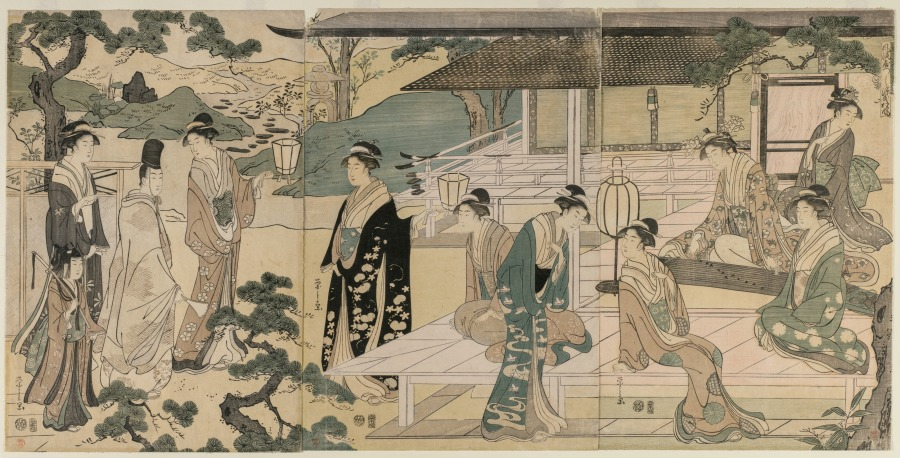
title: The Matsukaze Chapter of the Tale of Genji (from the series The Tale of Genji in Elegant Modern Dress)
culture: Japan, Edo period (1615–1868)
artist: Chōbunsai Eishi (Japanese, 1756–1829)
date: c. 1791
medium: triptych of woodblock prints; ink and color on paper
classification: Print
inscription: Artist's signature: Eishi ga. Artist's seal: Izumiya Ichibei (senichi han).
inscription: Censorship seal: kiwame.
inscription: Publisher: Izumiya